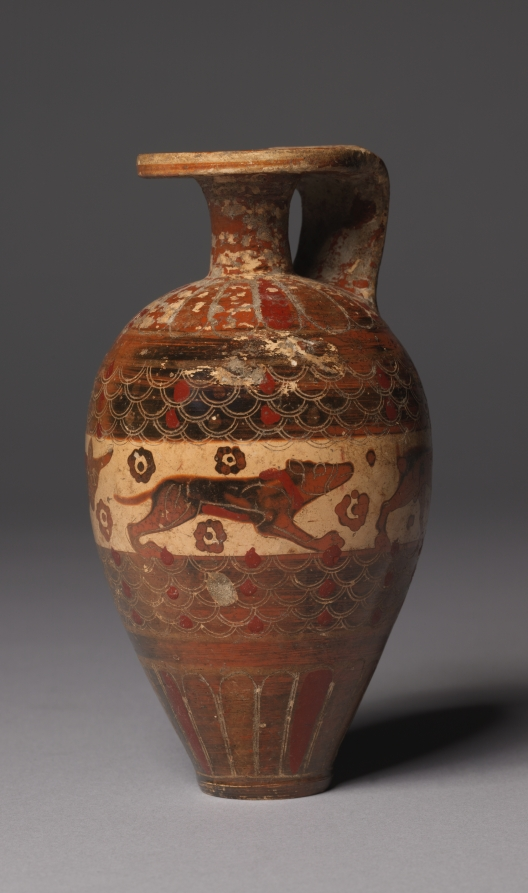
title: Protocorinthian (Early Black-Figure) Aryballos (Oil Flask): Animals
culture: Greek, Corinthian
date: c. 650–640 BCE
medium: ceramic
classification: Ceramic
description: Tongues encircle the rim, shoulder, and base of this small oil vessel, while two carefully incised bands of scales frame an animal frieze. Here, amid dot rosettes, are a bull, dog, and goat, all facing right, and a left-facing lion with head turned back. The black glaze has misfired red in many places, while added red enlivens numerous tongues, scales, and internal details.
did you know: Artists may have used a compass-like tool to create the intricate scale patterns.